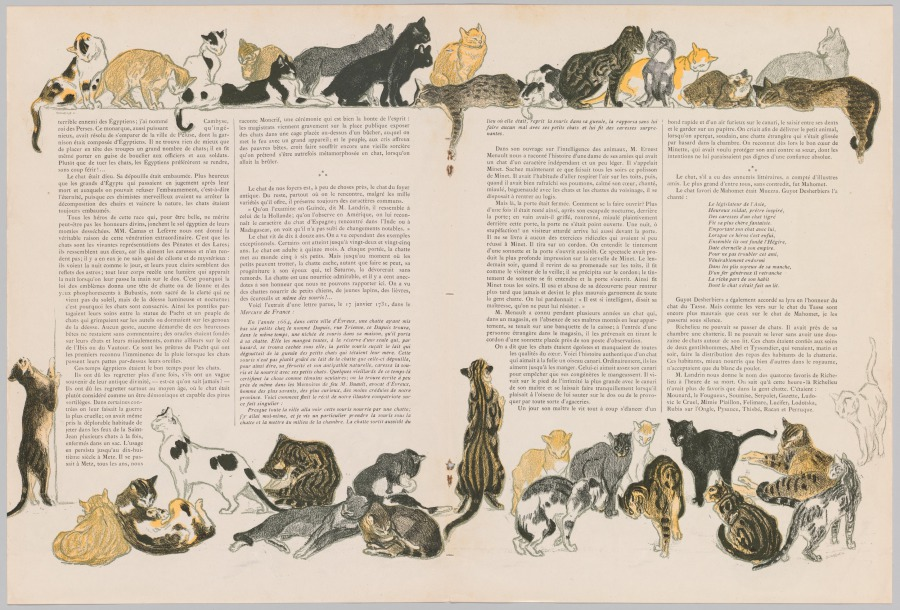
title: On Cats by Jacques Dalbray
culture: Switzerland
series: L’Illustration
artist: Théophile Alexandre Steinlen (Swiss, 1859–1923)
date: 1901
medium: Color lithograph illustration with letterpress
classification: Print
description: On this page from the March 30, 1901, issue of L’Illustration (Illustration), a French magazine, colorful depictions of cats surround a short text praising those animals and their place in history. The cats sit, sleep, and prowl around the columns of text, as if they are furnishings to climb and sleep on. Color illustrations were particularly difficult and expensive to reproduce before the advent of modern printing technology because each color had to be printed independently. As a result, artists like Théophile Alexandre Steinlen developed strategies to achieve the maximum effect by overlapping as few colors as possible, such as the yellow, gray, and black that create a variety of fur patterns here.